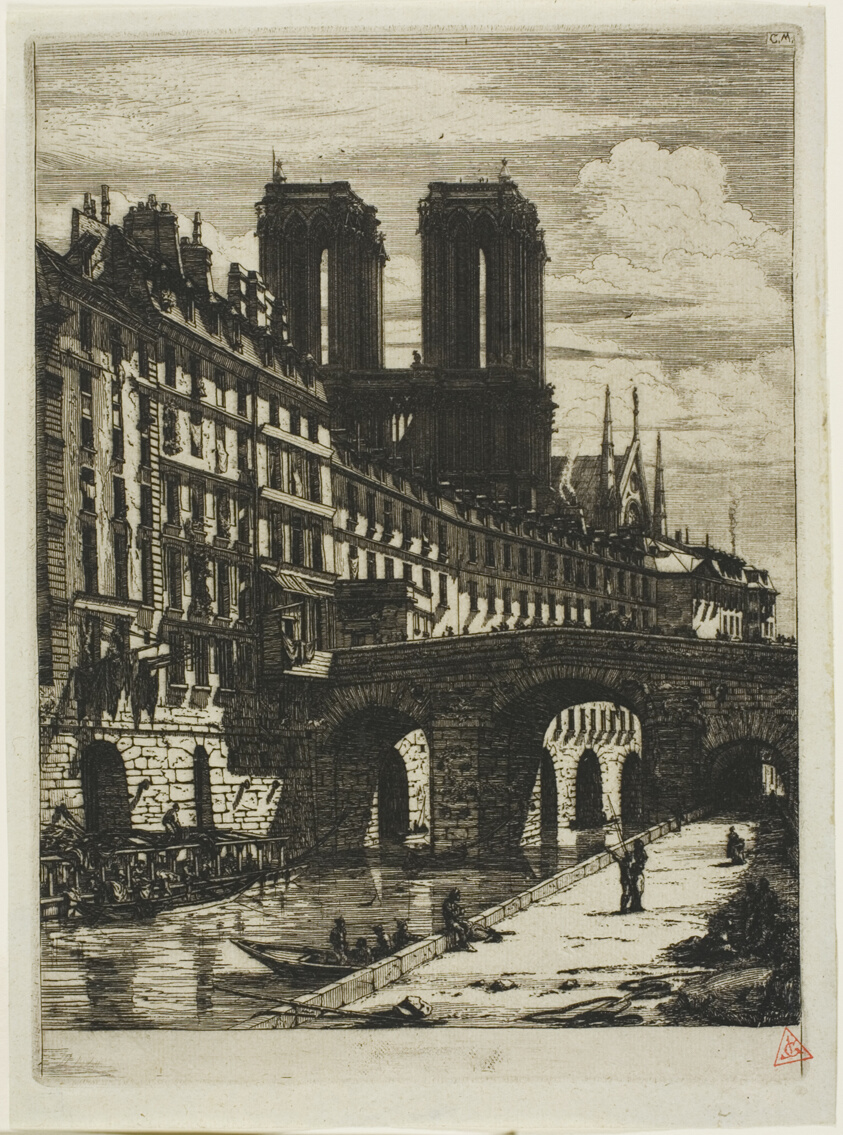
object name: Print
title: Le Petit Pont, Paris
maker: Charles Meryon (French, 1821-1868)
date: 1850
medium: Etching and engraving on greenish-ivory laid paper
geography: France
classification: etching; print; prints and drawing